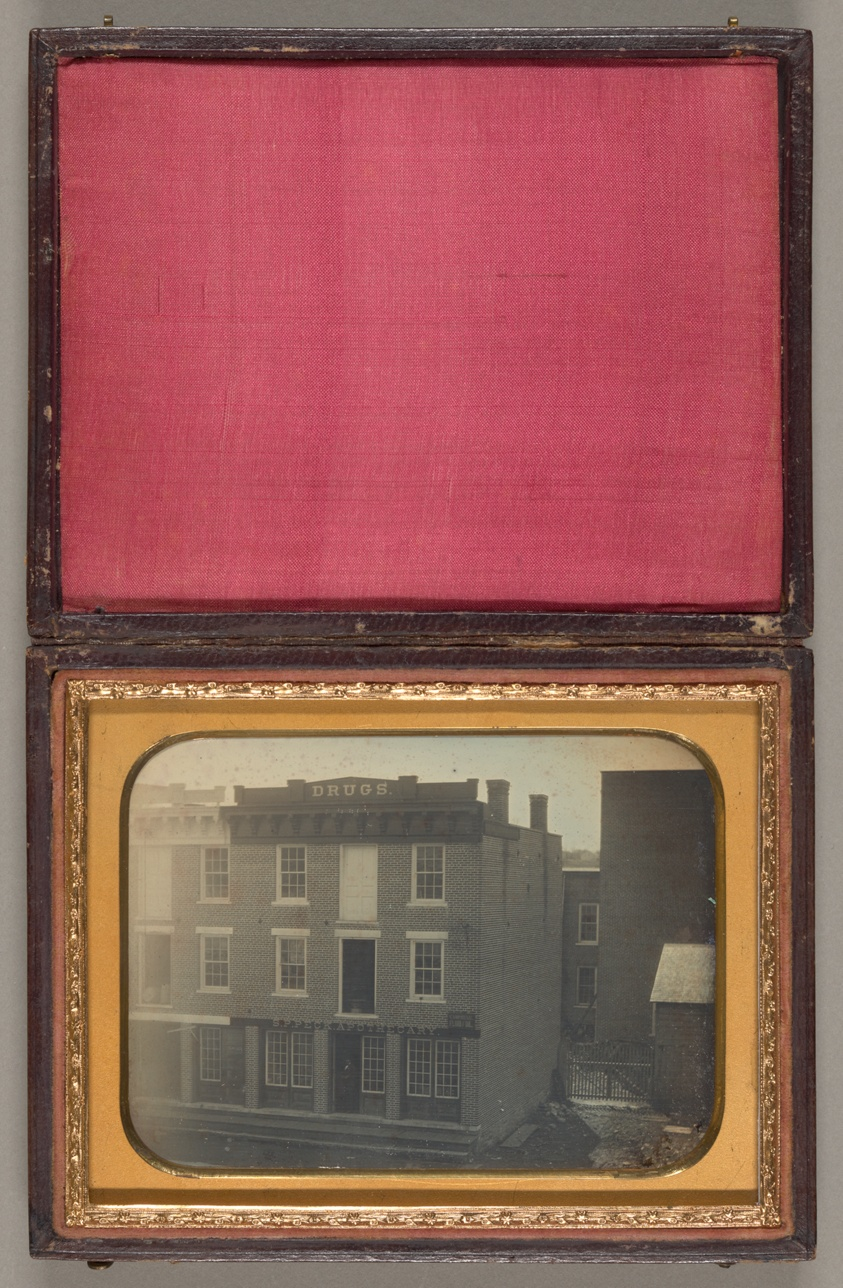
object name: Photograph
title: S. P. Peck Apothecary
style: 19th century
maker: Artist unknown; American, 19th century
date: 1839/60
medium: Daguerreotype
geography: United States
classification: daguerreotype; photographic process; photography; photograph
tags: Collected by Hugh Edwards